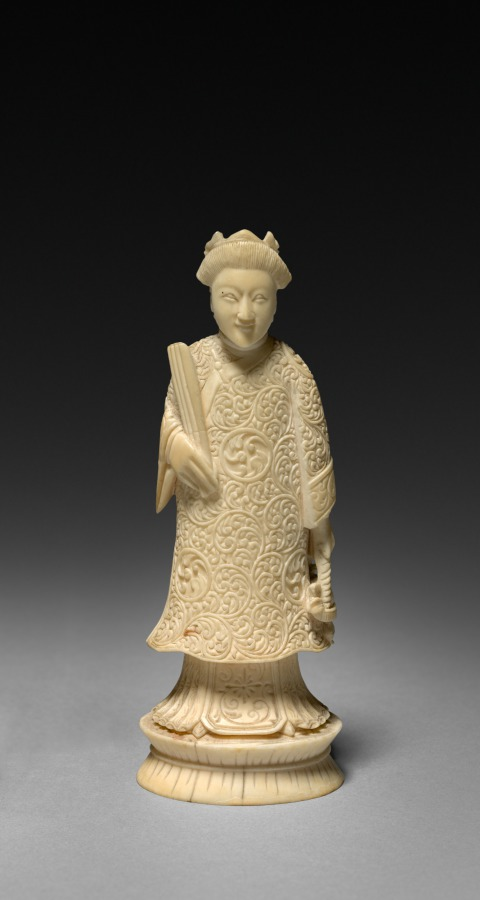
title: Chess Piece: Queen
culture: Japan, Meiji period (1868–1912)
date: early 1900s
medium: ivory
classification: Ivory